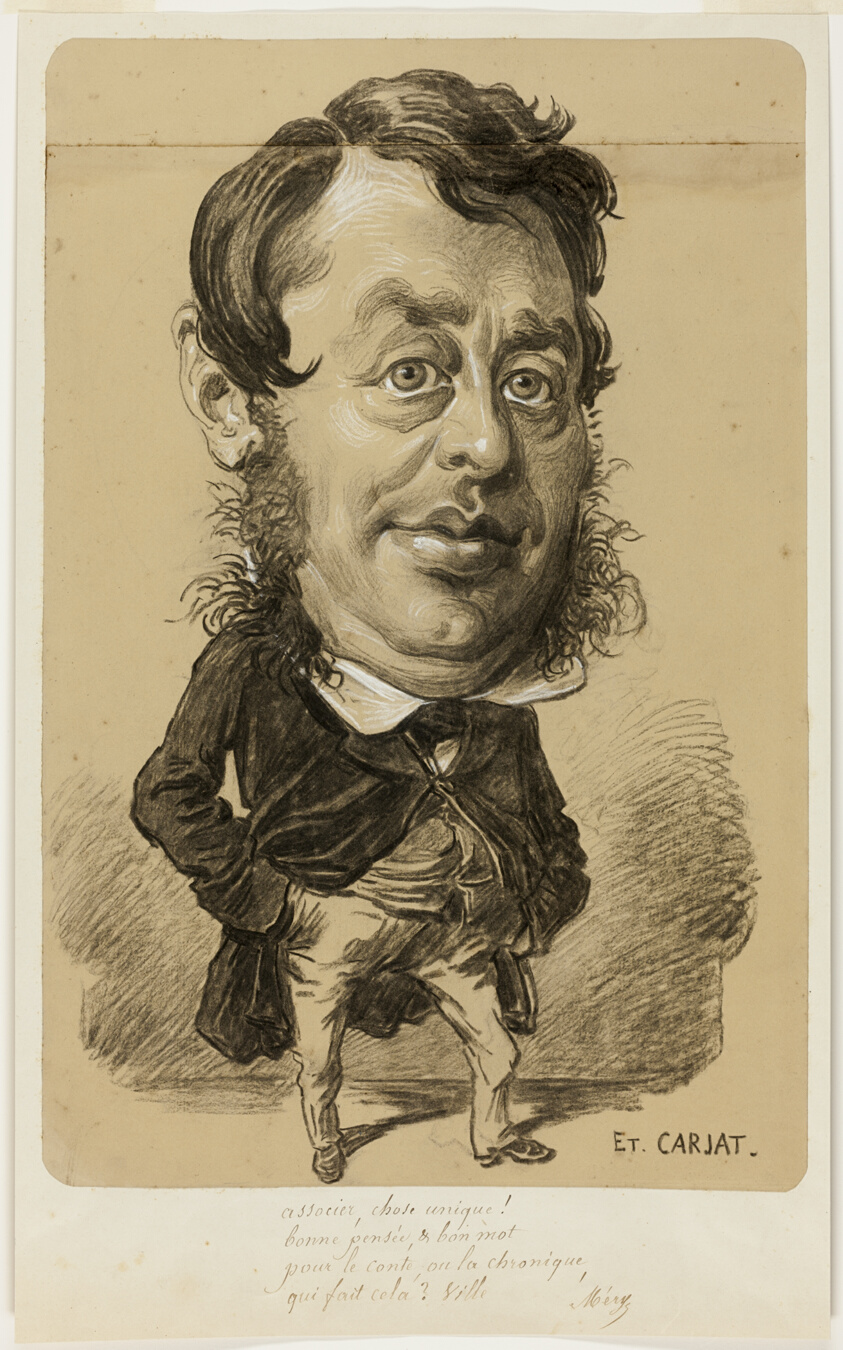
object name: Drawing and Watercolor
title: Caricature of a Man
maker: Etienne Carjat (French, 1828–1906)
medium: Charcoal, heightened with white chalk, on pieced tan wove paper, laid down on ivory wove paper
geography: France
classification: charcoal; paper; prints and drawing